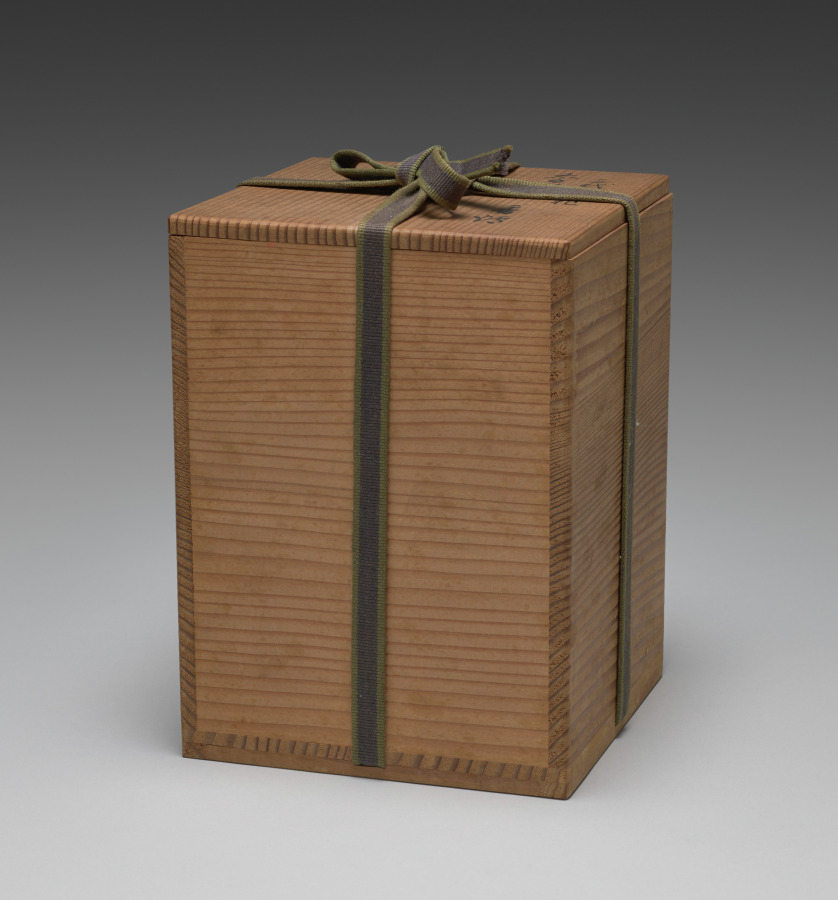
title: Incense Burner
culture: Japan, Meiji period (1868–1912)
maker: Seifū Yohei III (Japanese, 1851–1914)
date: 1893–1914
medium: Porcelain with creamy white glaze and molded design and floral openwork silver lid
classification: Ceramic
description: Yohei III made incense burners in a wide variety of designs and styles. The body and glaze of this one are taihakuji, or “great white porcelain,” an important early invention Yohei III devised in 1872. The burner has rounded, cabriole legs, resembling tiny table legs, attached to the exterior and the faintest decorative band around the bottom. Lids were produced outside the studio by metalwork specialists. For this incense burner, they created a floral-patterned silver lid.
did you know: This cylindrical incense burner has a distinctive translucent, creamy glaze over an ivory-colored clay body.